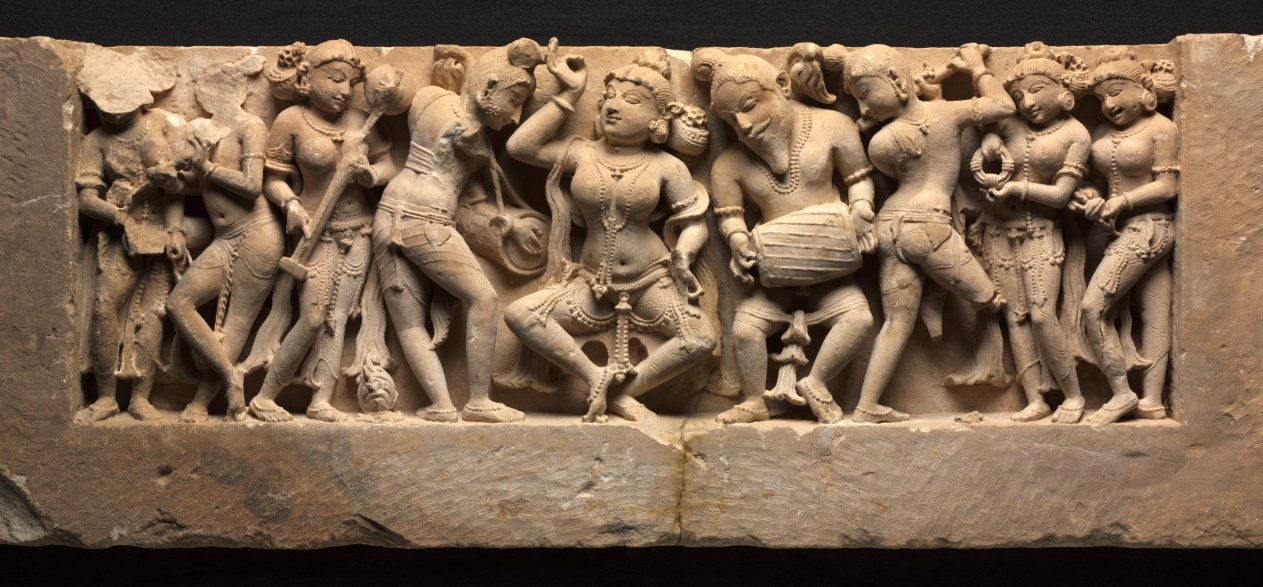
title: Frieze with Dancer and Musicians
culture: Northwestern India, Rajasthan, Sikar, Harshagiri, 10th century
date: c. 973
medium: sandstone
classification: Sculpture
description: A dancer, who strikes a pose in the center, is accompanied by a full orchestra of musicians in lively variegated poses. At the far left, a woman plays the cymbals, her mouth open in song. Twisting turning postures of figures wrought in high relief with little background space behind them are characteristics of Indian sculpture from the medieval period. Music and dance were important components of devotional temple activities; they were considered as pleasing to the divinity and attractive for devotees as the works of sculpture and architecture.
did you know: The twisting, dynamic postures of the musicians in this frieze may visually echo the joyful music they are playing together.